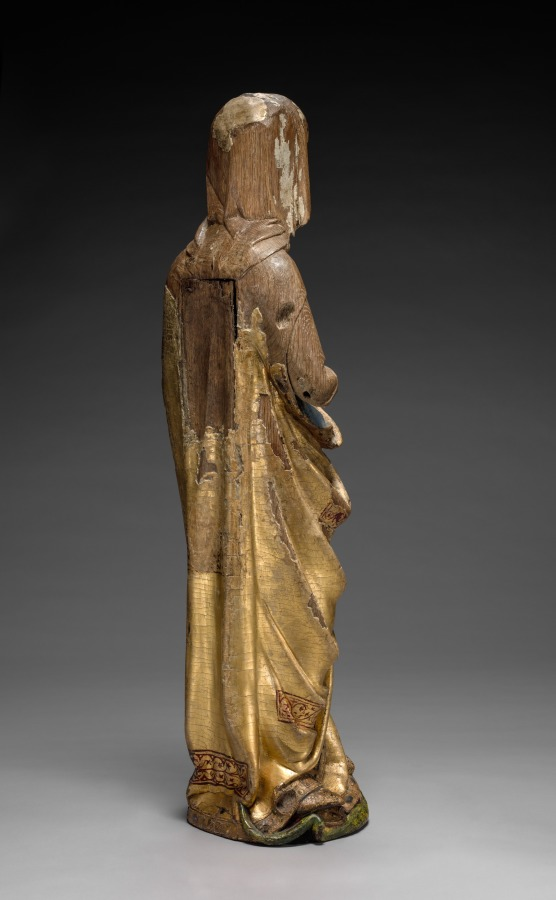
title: Virgin and Child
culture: Mosan (Valley of the Meuse), Liège(?), late 13th century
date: late 1200s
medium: wood (oak) with polychromy and gilding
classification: Sculpture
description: This sculpture is a rare survival in wood from the valley of the Meuse River (modern Belgium and Holland), an important region for the production of ecclesiastical art in the 1100s and 1200s. The elegantly draped figure is remarkable for the preservation of much of its original paint and gilding, including the Virgin's gilded mantle highlighted with decorative bands of geometric patterns and the green dragon on which she stands. There are small settings around the Virgin's neck and along the border of the mantle that would have originally been set with gem and glass cabochons in imitation of the richly adorned metalwork for which Mosan art was highly esteemed. The settings for these cabochons provide some hint of the original opulence of this sculpture. The Virgin's serene features and beautiful countenance are noteworthy, as is the refined execution of the draperies.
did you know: Dragons, like the one Mary is standing on, sometimes look more like snakes in medieval art.